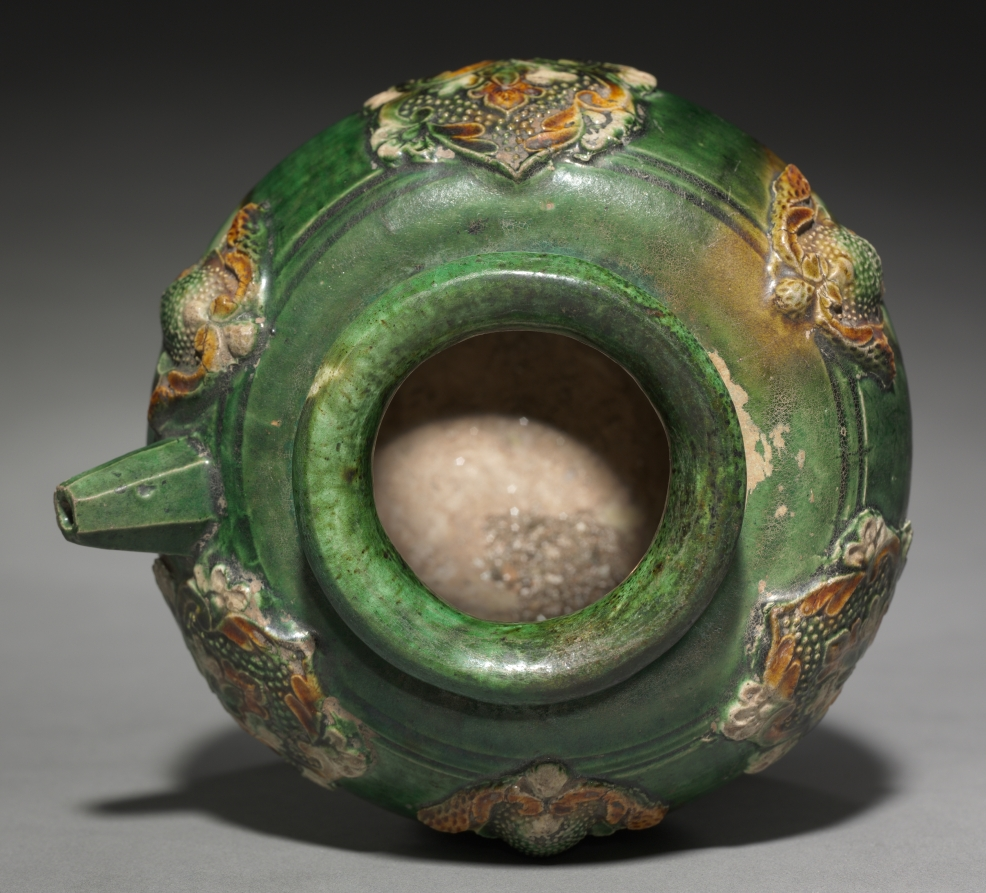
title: Jar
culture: China, Tang dynasty (618-907)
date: late 600s–700s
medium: pottery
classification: Ceramic